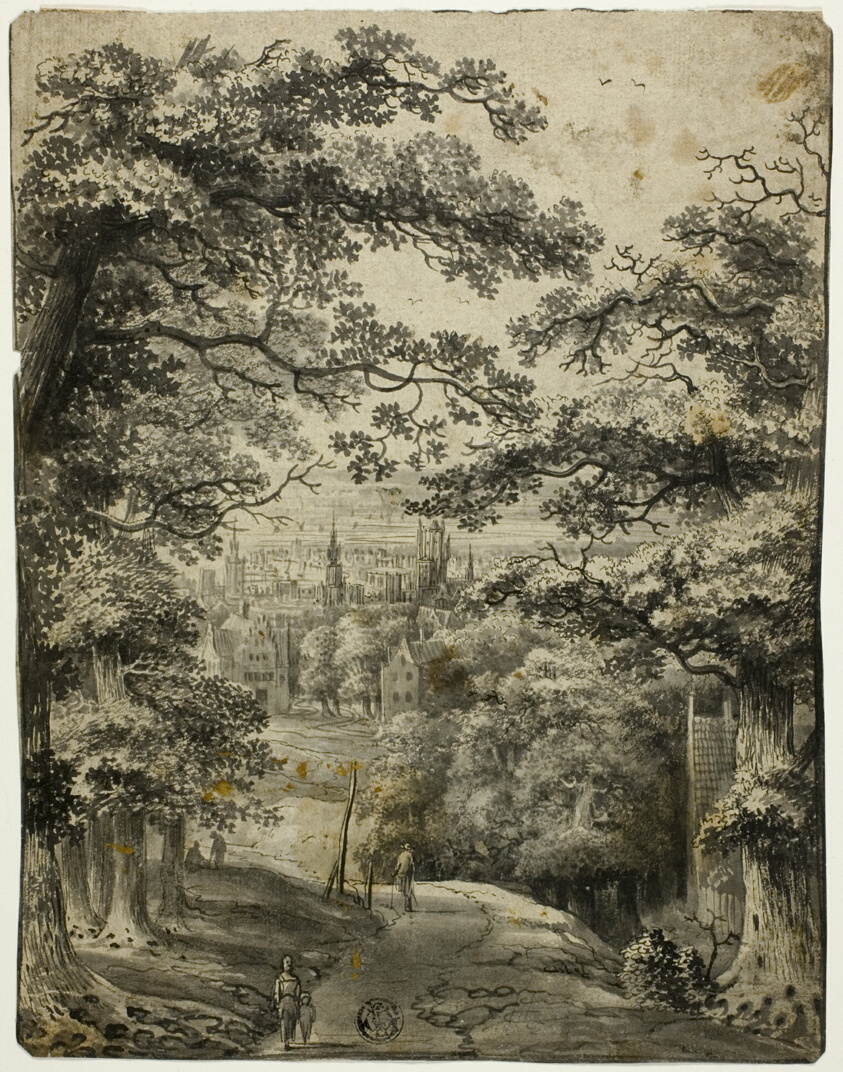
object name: Drawing and Watercolor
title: View of City from Road on Hill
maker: Jan Looten (Dutch, 1618-1681)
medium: Pen and black ink, with brush and brown wash, on ivory laid paper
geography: Holland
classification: pen and ink drawings; drawings (visual works); prints and drawing